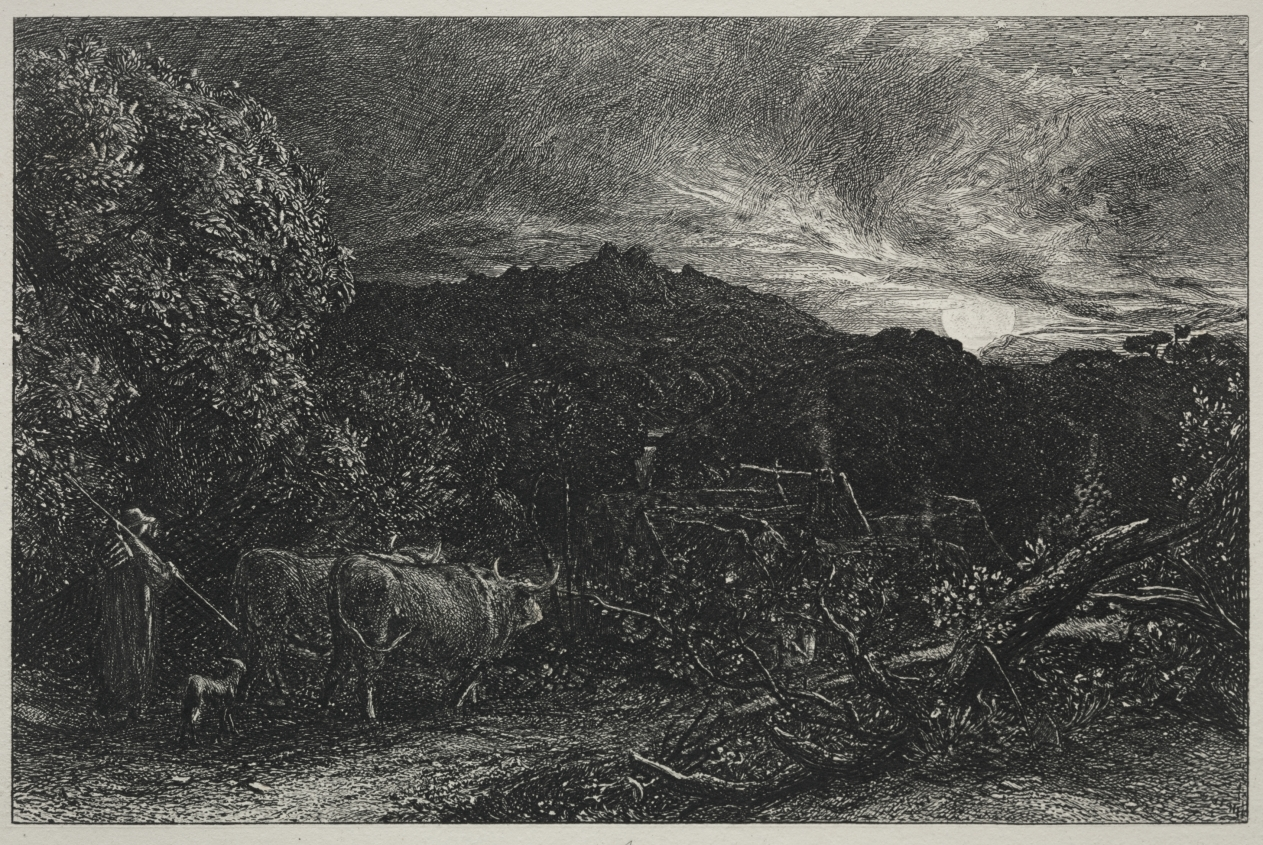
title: The Weary Plowman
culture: England, 19th century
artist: Samuel Palmer (British, 1805–1881)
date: begun 1858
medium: etching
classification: Print